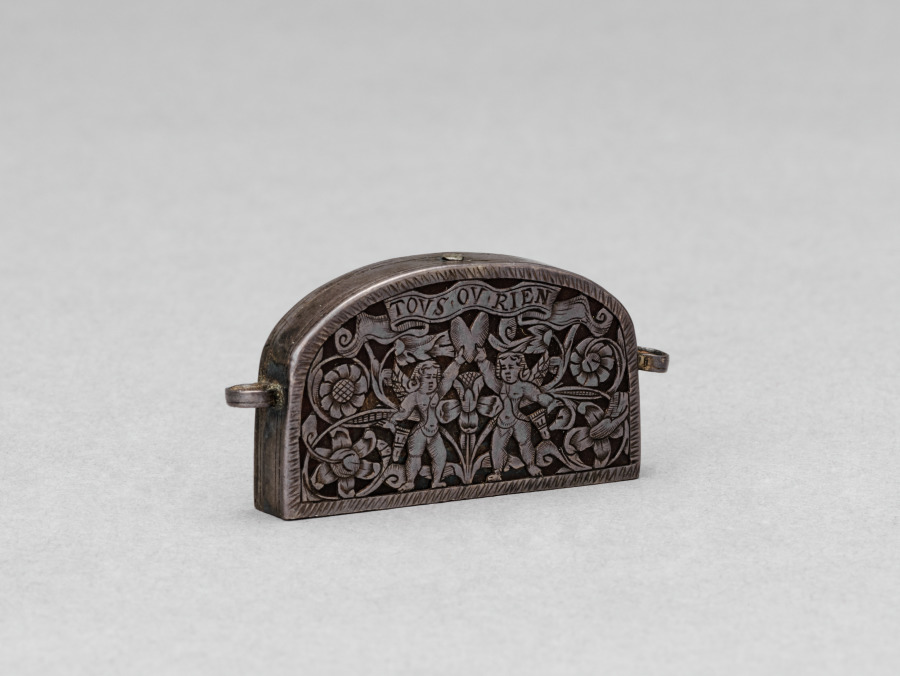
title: Scissors Case (Etui)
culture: The Netherlands or France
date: c.1690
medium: silver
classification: Silver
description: Attached to a belt loop, silver scissor cases were practical fashion accessories. Intricately designed and expensively produced, they demonstrated the wealth of a wearer. Cases like this one were often decorated with motifs of love and given as traditional wedding or engagement gifts. On one side of this case, two putti raise a heart above their heads, on the other they defend it with a pair of crossed spears.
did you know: The inscription on this scissor box reads “TOVS. OV. RIEN” (all or nothing) on one side and “IE. PERIRAI. PLVSTOS” (I would rather die) on the other.